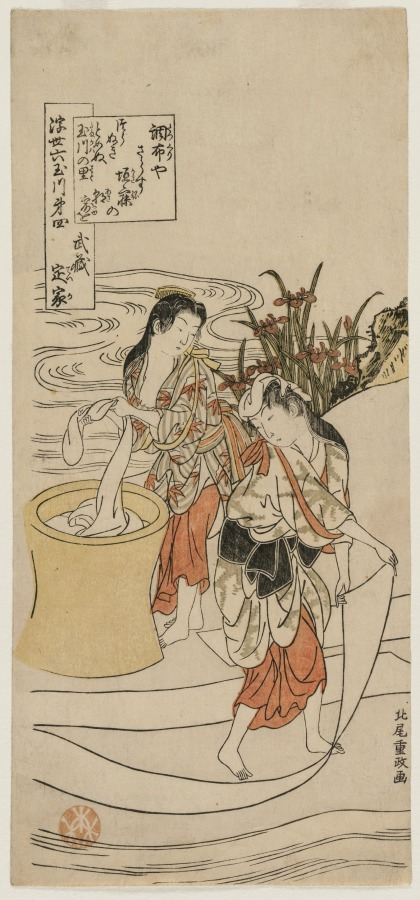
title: The Chofu Tama River in Musashi Province (from the series The Six Tama Rivers of the Floating World)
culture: Japan, Edo period (1615–1868)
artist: Kitao Shigemasa (Japanese, 1739–1819)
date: c. 1770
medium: color woodblock print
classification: Print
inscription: Signature: Kitao Shigemasa ga Publisher: Tsurushin? (emblem)